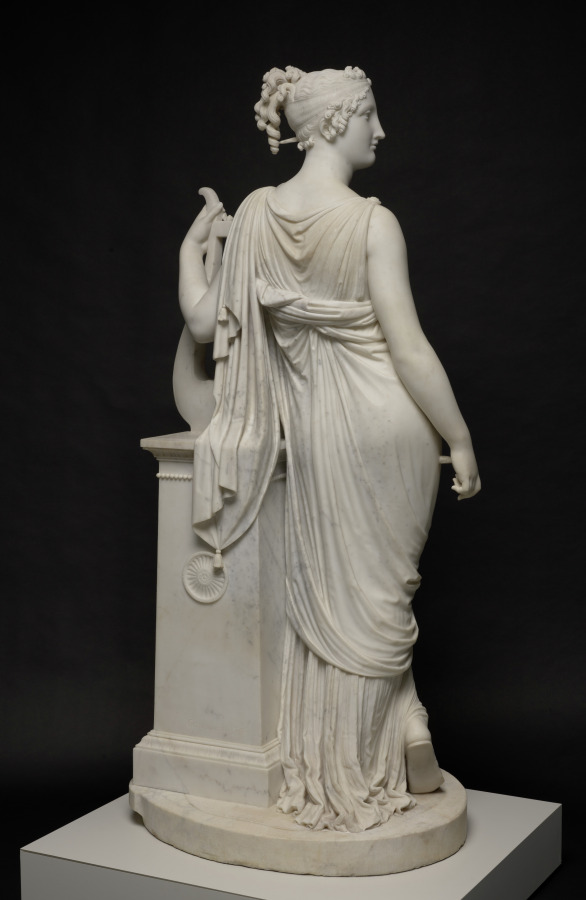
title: Terpsichore Lyran (Muse of Lyric Poetry)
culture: Italy, 19th century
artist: Antonio Canova (Italian, 1757–1822)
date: 1816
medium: marble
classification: Sculpture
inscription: inscribed on front of column: "Terpsichore Lyran" [Terpsichore as the Muse of lyric poetry]; inscribed at base of column: "Canova Fact: 1816"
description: In Greek mythology, Terpsichore was one of the nine Muses, or goddesses of creative inspiration. The lyre, the Greek inscription on the short column, and the caduceus (entwined snakes) on the side identify the figure as Terpsichore Lyran, muse of lyric poetry. This sculpture began with a commission from Napoleon's brother, Lucien, for an idealized portrait of his wife, Alexandrine. Antonio Canova made this version for a British aristocrat and exhibited it in 1817 at the Royal Academy in London to great acclaim.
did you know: Trained by his grandfather, an Italian stonemason, Canova began modeling clay and carving marble sculptures before age ten.